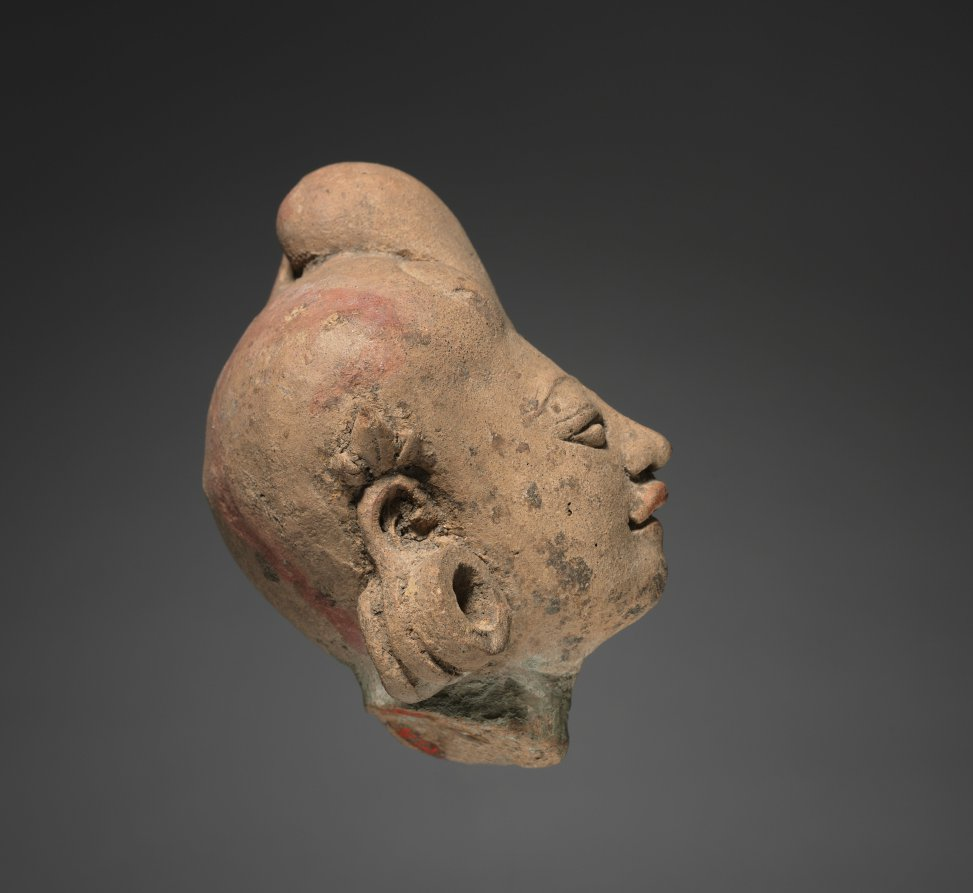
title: Female Head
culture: Eastern Java, Majapahit Dynasty (1293-1478)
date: Majapahit Dynasty (1293–1478)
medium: terracotta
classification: Sculpture